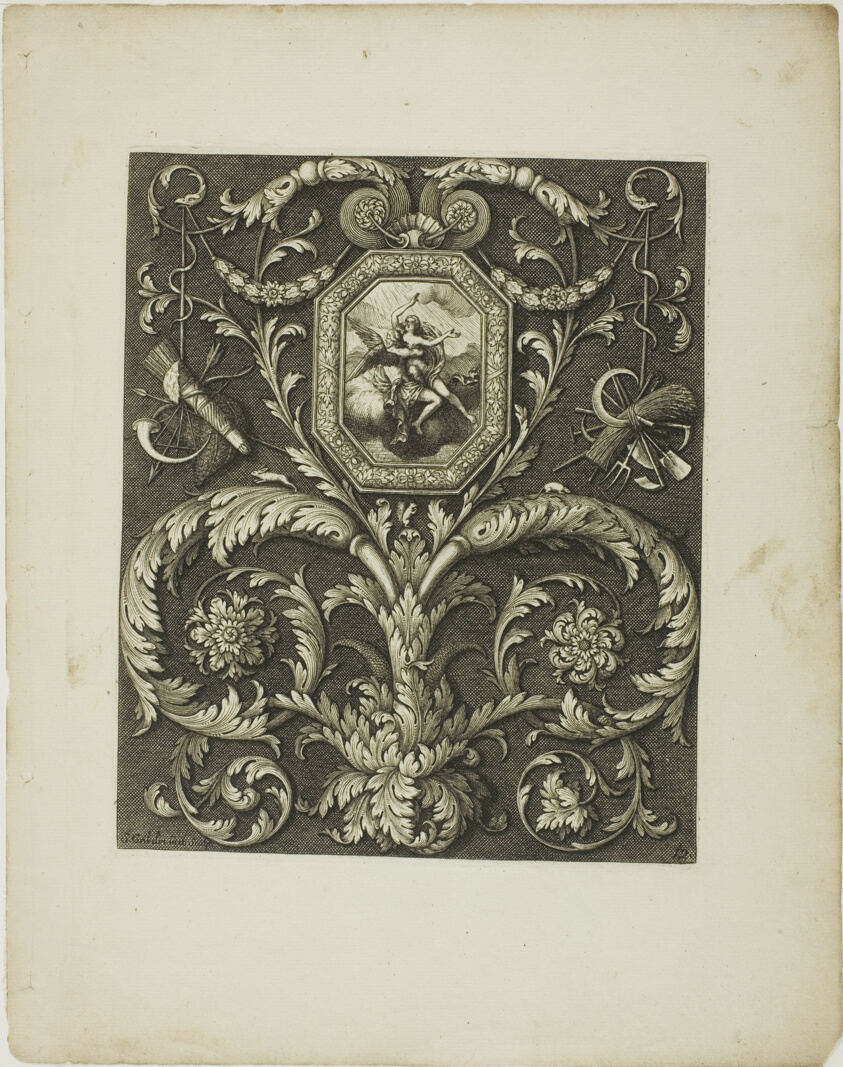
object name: Print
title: Plate Twelve, from A New Book of Ornaments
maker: Simon Gribelin II; French, 1661-1733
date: 1704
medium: Engraving on paper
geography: France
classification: engraving; print; prints and drawing